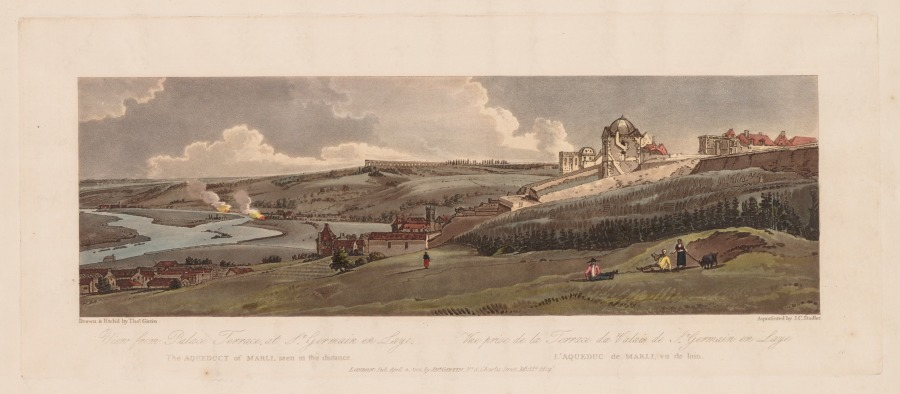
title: A Selection of Twenty of the Most Picturesque Views in Paris: View from Palace Terrace, at St. Germain en Laye, the Aquaduct of Marli seen in the Distance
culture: England, 19th century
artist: Thomas Girtin (British, 1775–1802)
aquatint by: Joseph Constantine Stadler (German, active 1780–1822)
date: 1803, printed 1810 or after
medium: softground etching and aquatint printed in brown, hand-colored with watercolor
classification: Print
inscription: In plate, lower right: 16; In plate: Drawn & Etch'd by Thos Girtin; Aquatinted by J. C. Stadler; LONDON: Pub April 4 1803 by JNoGIRTIN, No. 8, Charles Street, Middlesex Hospital